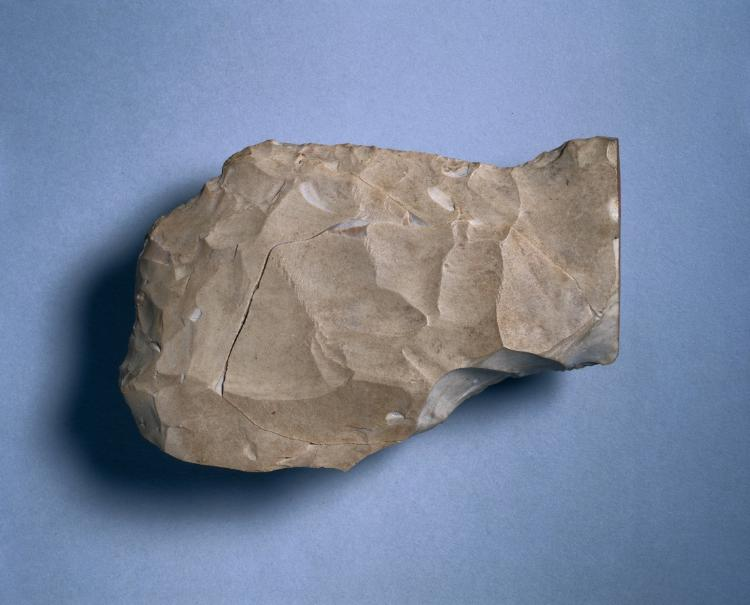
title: Ax Head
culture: Egypt, Haraga, excavated in 1914, Middle Kingdom (2040–1648 BCE), Dynasty 12, reign of Senusret III (1878–1839 BCE)–Dynasty 13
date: 1886–1648 BCE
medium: flint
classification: Implements